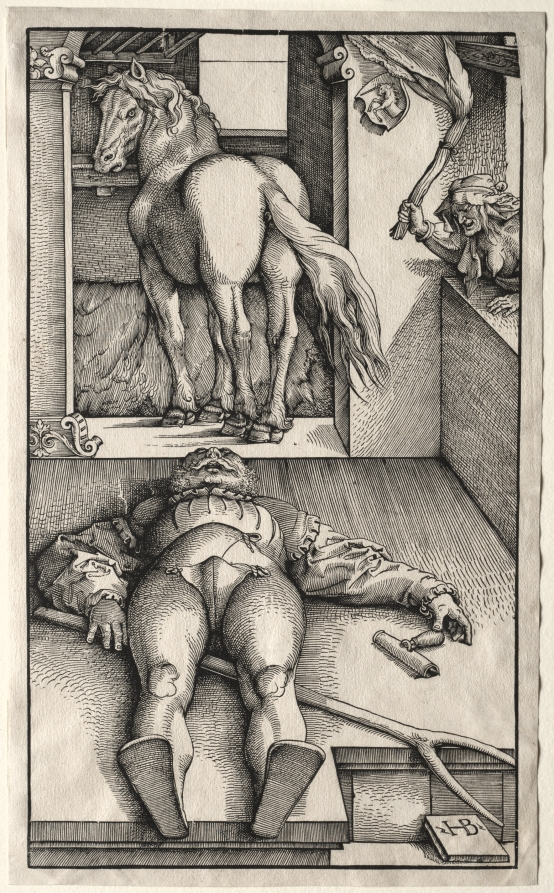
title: The Bewitched Groom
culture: Germany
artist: Hans Baldung (German, 1484/85–1545)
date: 1544–45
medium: woodcut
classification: Print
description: Although the scene is enigmatic, presumably the witch has worked her magic through the physical power of the horse, who rendered the groom unconscious and now glowers at him. Representations of witchcraft were common during the early 16th century, a period of emerging moral reform and religious fervor. Baldung seemed to be obsessed with the evil power of female sexuality: representations of women with sinister or malicious connotations and their association with vulnerability and death are features of his work. Since Baldung's coat of arms appears on the wall behind the groom, who also bears some facial resemblance to portraits of the artist, some autobiographical reference may have been intended. Bewitched Groom presents a pessimistic view of man—or perhaps Baldung himself—who cannot resist the superior and evil forces of nature. The inevitability of physical passion, and its connection with the frailty of human nature, is a recurring theme in the artist's work.